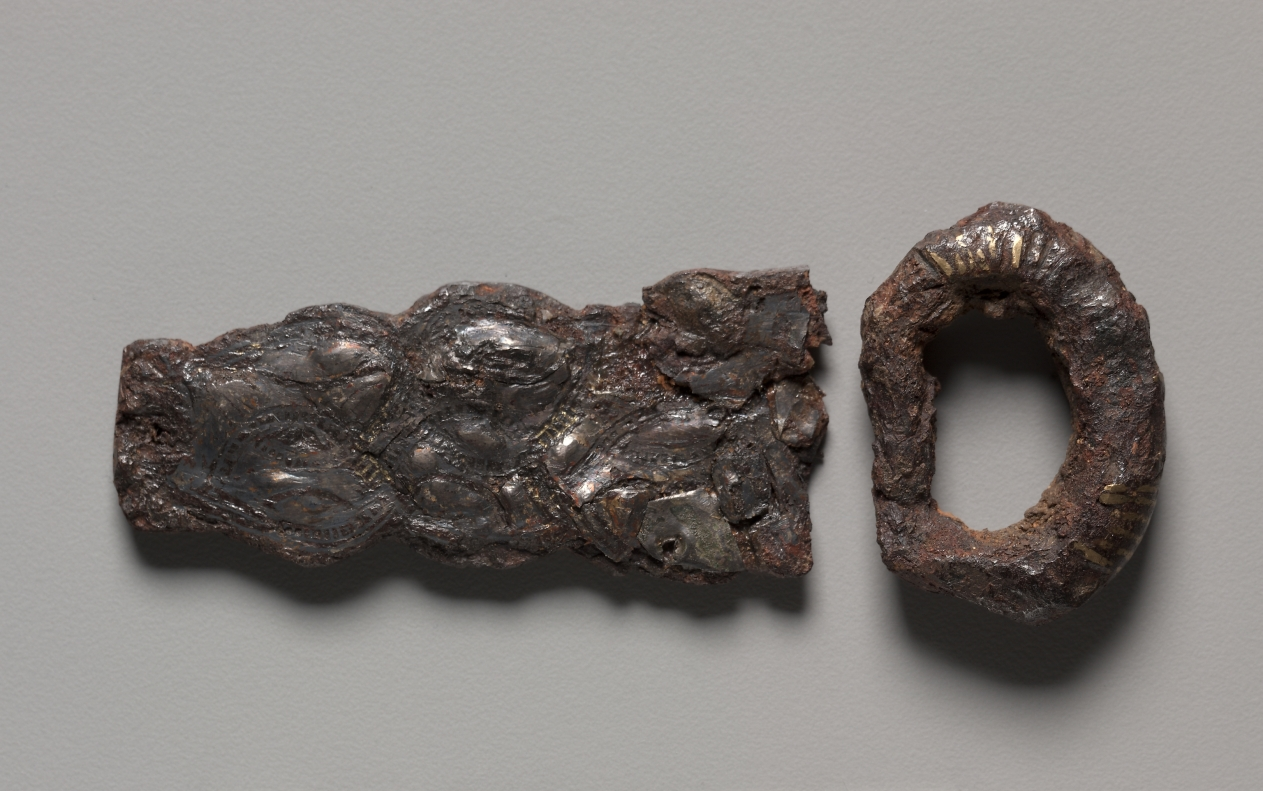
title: Buckle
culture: Merovingian, Burgundian, Migration period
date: 600s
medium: iron with silver overlay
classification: Jewelry